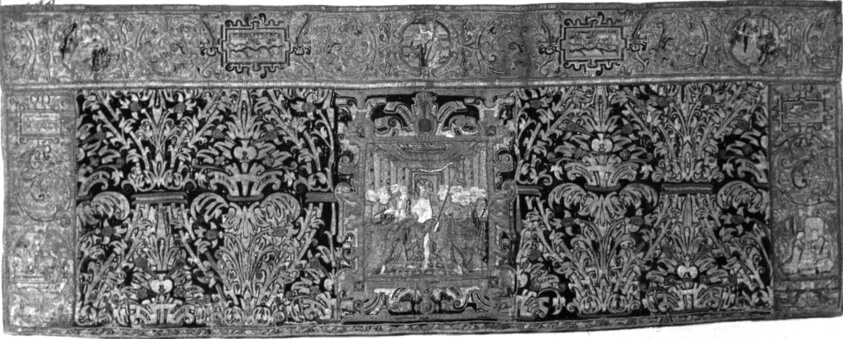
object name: Religious/Ritual Object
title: Altar Frontal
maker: Spain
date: 16th century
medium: Red velvet embroidered with gold and silver; bands and panels embroidered with gold and colored silk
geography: Spain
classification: textile; needlework (visual works); weaving; liturgical; altar; ritual objects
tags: altar